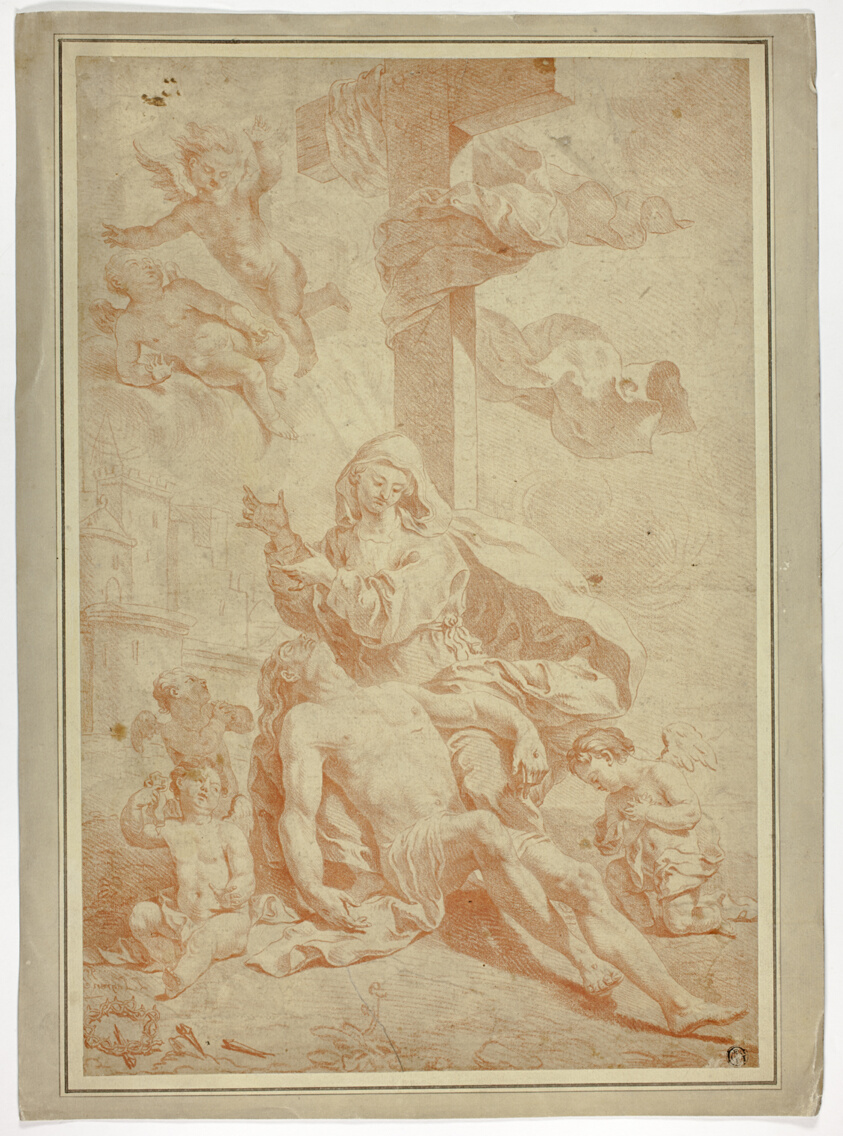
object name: Print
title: Pietá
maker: After Louis-Jean-François Lagrenée; French, 1724-1805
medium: Lithograph in sanguine on buff laid paper, laid down on cream laid paper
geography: France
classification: lithograph; print; prints and drawing